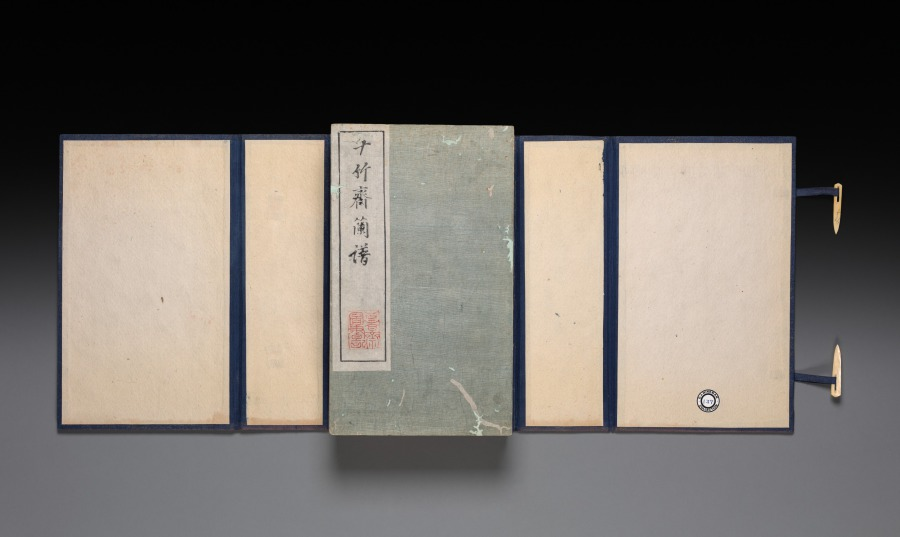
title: Ten Bamboo Studio Painting and Calligraphy Handbook (Shizhuzhai shuhua pu): Volume Two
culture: China, Jiangsu province, Nanjing, Qing dynasty (1644–1911)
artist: Hu Zhengyan (Chinese, c. 1584–1674)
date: 1633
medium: Woodblock-printed book; ink and colors on paper; first edition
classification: Print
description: Color printing reached a level of perfection in the early 1600s, as seen in this Ten Bamboo Studio Collection of Calligraphy and Painting and the Mustard Seed Garden Manual of Painting (printed 1679 and 1701). The painterly quality, precision in registering (aligning) the woodblocks, and harmonious colors made them the most successful color print editions in Chinese history. Both editions were printed and compiled in Nanjing, spread nationwide, and had a great impact on the arts in Japan and Korea.